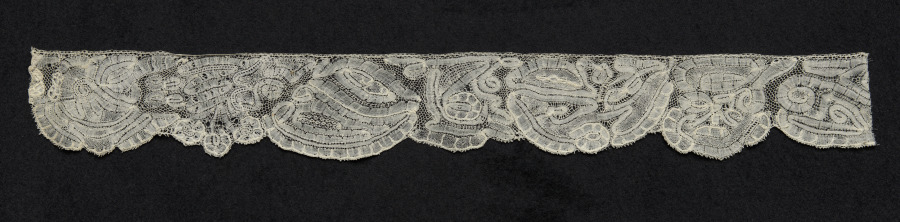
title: Lace Edging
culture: Belgium, Brussels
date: 1700s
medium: Bobbin lace (Point d'Angleterre?)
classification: Lace